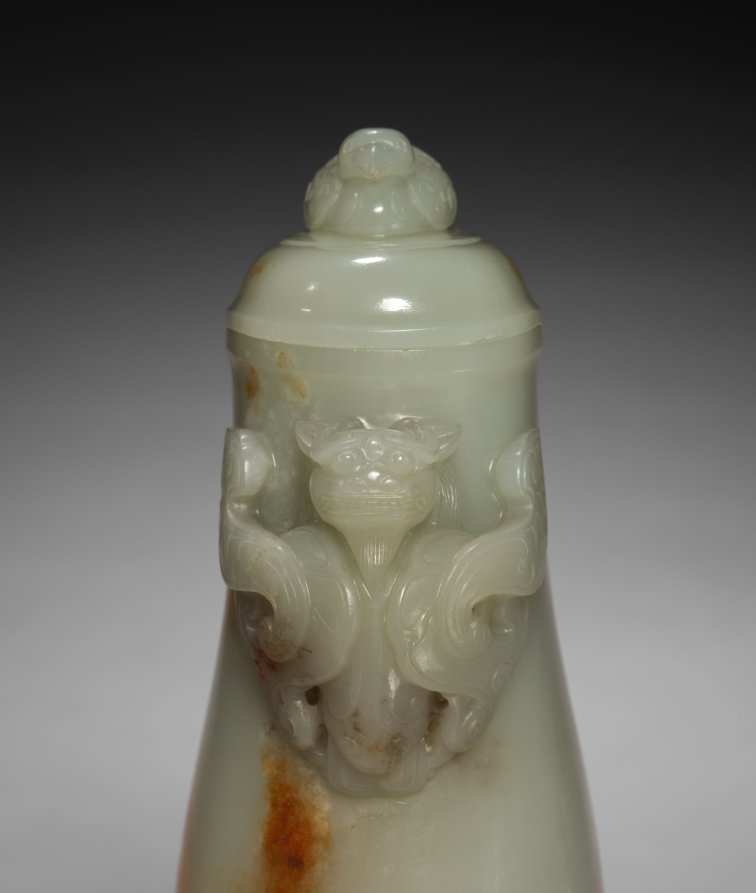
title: Pitcher (Gong) with Dragon and Bird-Headed Handle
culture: China, Qing dynasty (1644–1911)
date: 1700s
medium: pale greenish-white jade with brown markings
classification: Jade